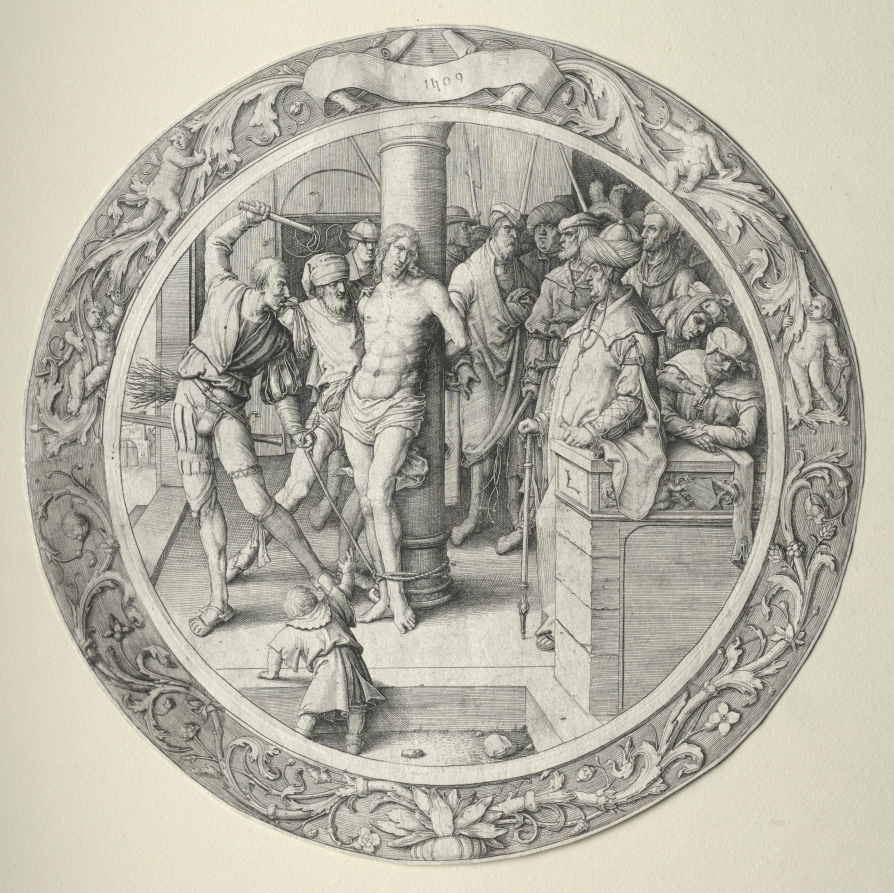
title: The Round Passion: The Flagellation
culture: Netherlands, 16th century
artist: Lucas van Leyden (Netherlandish, 1494–about 1533)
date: 1509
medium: engraving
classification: Print